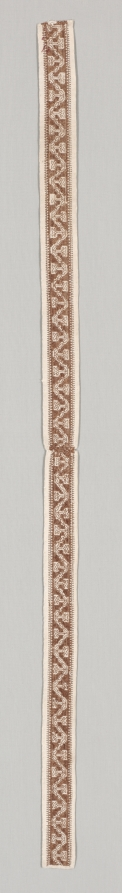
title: Embroidered Band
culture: Italy, 17th century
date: 1600s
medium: embroidery; silk on linen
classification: Embroidery